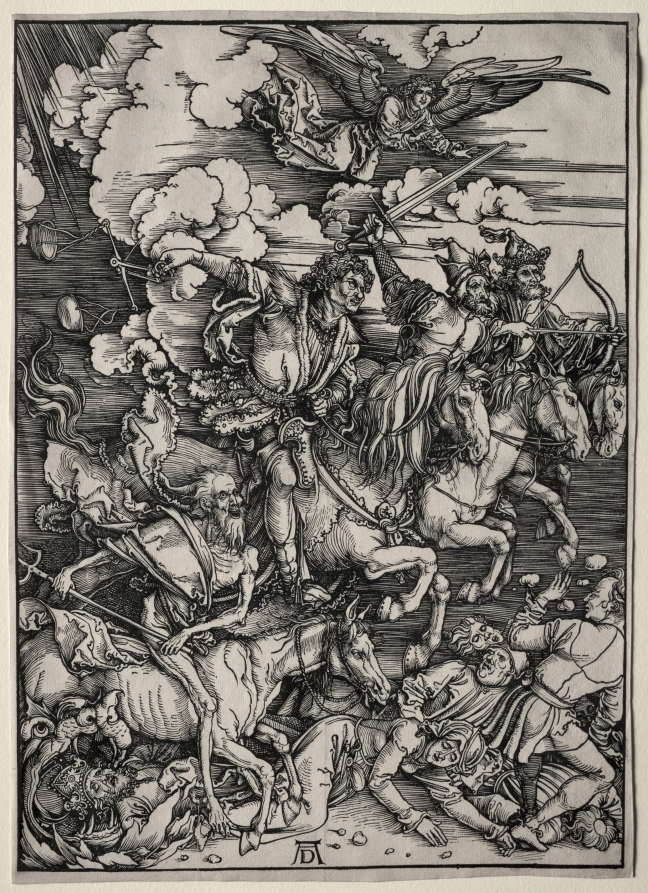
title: The Four Horsemen, from The Apocalypse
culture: Germany, late 15th-early 16th Century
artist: Albrecht Dürer (German, 1471–1528)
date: c. 1498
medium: woodcut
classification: Print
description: In 1498 Dürer published a book illustrating the Revelation of John or the Apocalypse of John, the last book of the New Testament. The images were unique in their large scale, breadth of concept, and unity of design. The first book to be both published and illustrated by the artist, it comprised a title page and 15 full-sheet woodcuts featuring text on the verso of all the sheets except the last one. Often visible through the paper, the text mars the image on the recto of the sheet. The finest impressions were most often printed without text, like this one of The Four Horsemen. Here, Dürer suggested the vigorous momentum of the horsemen through the windblown clothing of the riders, the windswept clouds, and the figures trampled beneath the hooves of the approaching horses.